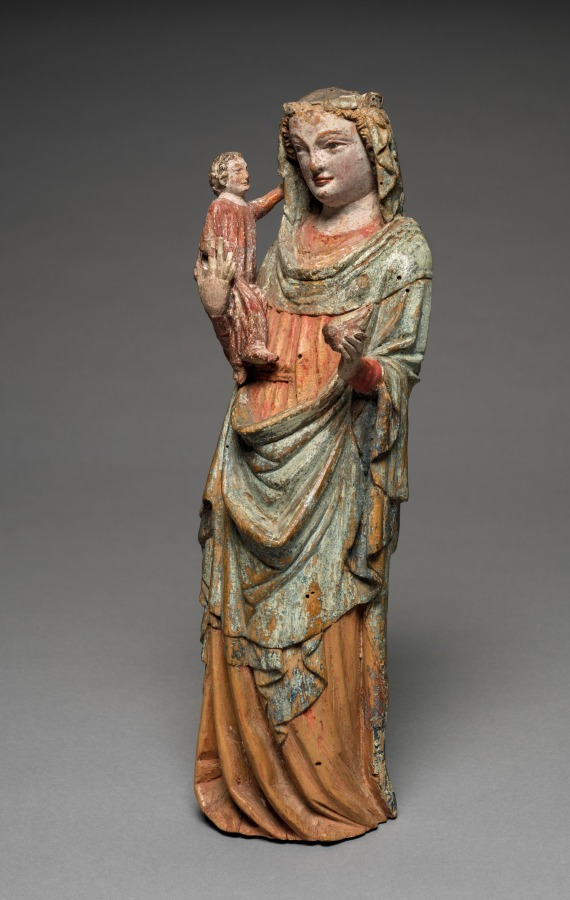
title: Reliquary Statuette of the Virgin and Child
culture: Austria, Salzburg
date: c. 1330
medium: painted lindenwood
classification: Sculpture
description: A small rectangular cavity in the back of this sculpture reveals that it was originally made to serve as a reliquary (a container for relics). In her left hand the Virgin holds a pear, a symbol of the peace and love of Christ.